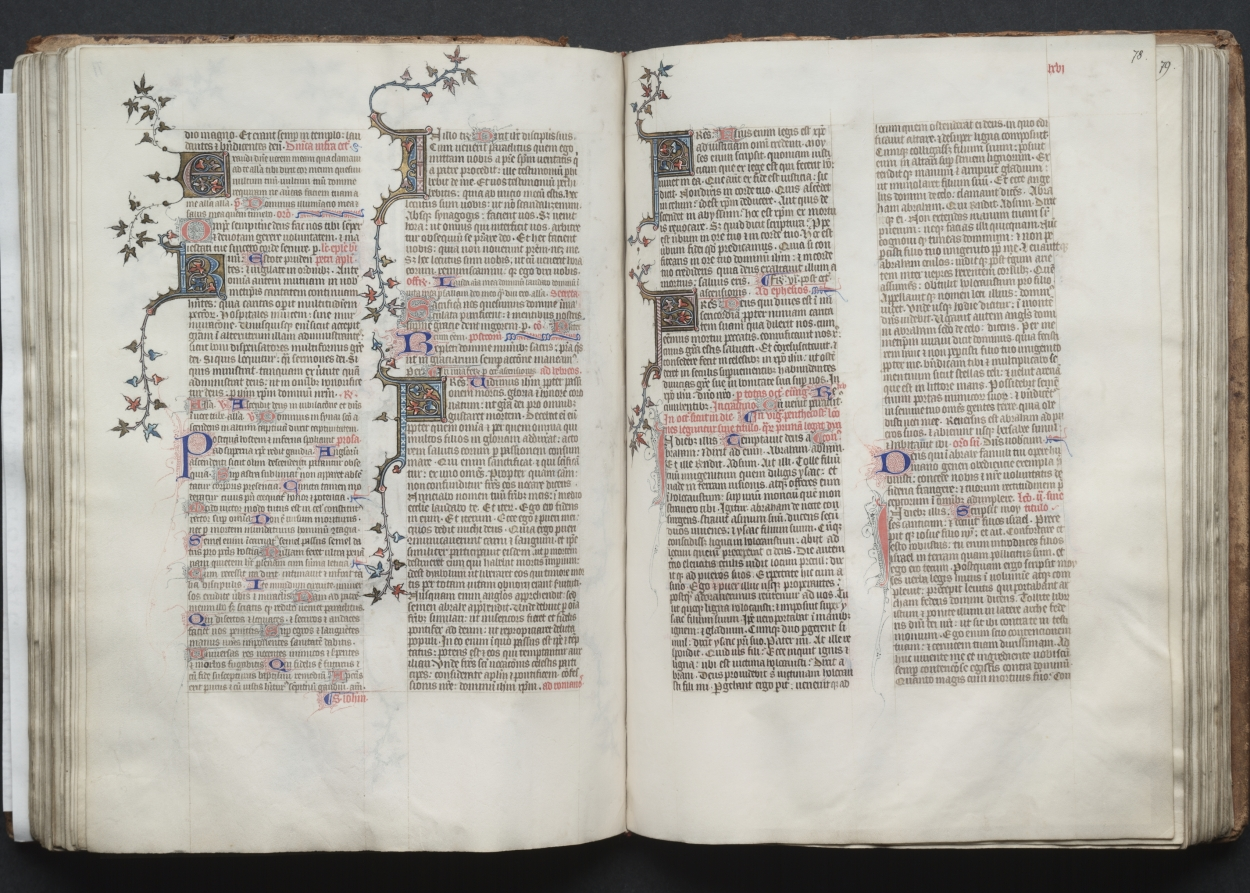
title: The Gotha Missal: Fol. 78r, Text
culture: France, Paris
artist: Master of the Boqueteaux (French)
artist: and Workshop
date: c. 1375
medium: ink, tempera, and gold on vellum; blind-tooled leather binding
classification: Bound Volume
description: The style and quality of this manuscript's decoration is typical of deluxe Parisian books made for aristocratic or royal patrons. Most of the book's decoration appears to be the work of the Master of the Boqueteaux, an artist active at the court of King Charles V (died 1380). His style was apparently shared by a number of book illuminators working in and around Paris. It is very possible that the Gotha Missal belonged to Charles V, but is not provable because the manuscript has no royal portraits and lacks a colophon. Given the book's magnificent decoration, however, it would seem that it was produced for a Valois prince, if not for the king himself. The manuscript receives its name from the German dukes of Gotha, its later owners.